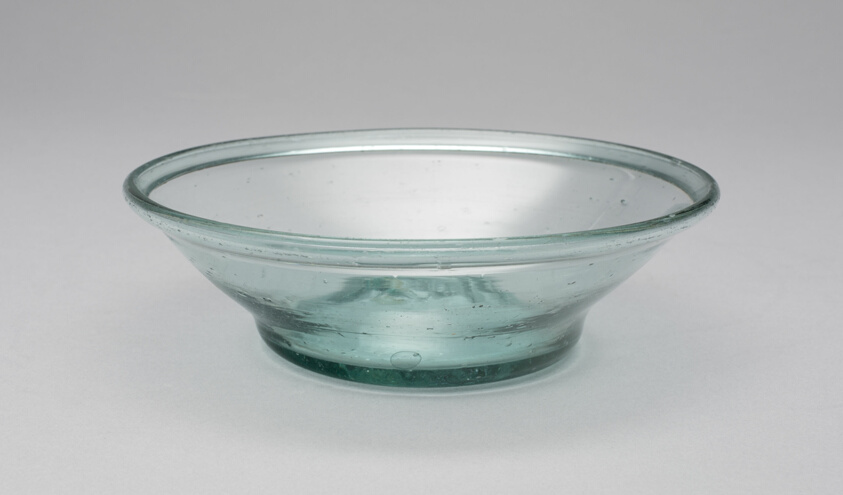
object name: Glass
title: Pan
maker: Mantua Glass Works (Manutua, Ohio, 1821–1829)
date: c. 1825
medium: Blown glass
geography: Mantua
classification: container; glass; american decorative arts; american arts; decorative arts